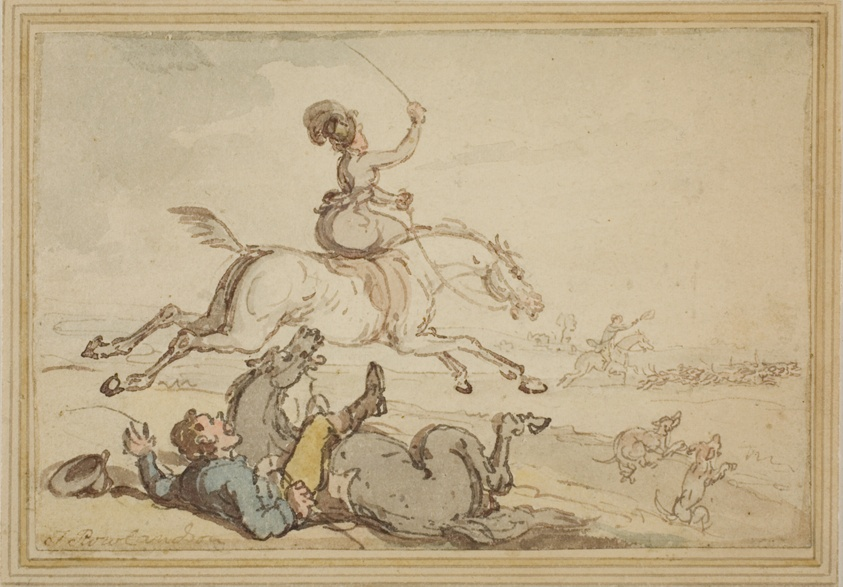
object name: Drawing and Watercolor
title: Rider Thrown at a Hunt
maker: Thomas Rowlandson (English, 1756-1827)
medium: Pen and brown ink with brush and watercolor over traces of graphite, on cream wove paper, laid down on card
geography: England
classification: watercolor; drawings (visual works); prints and drawing